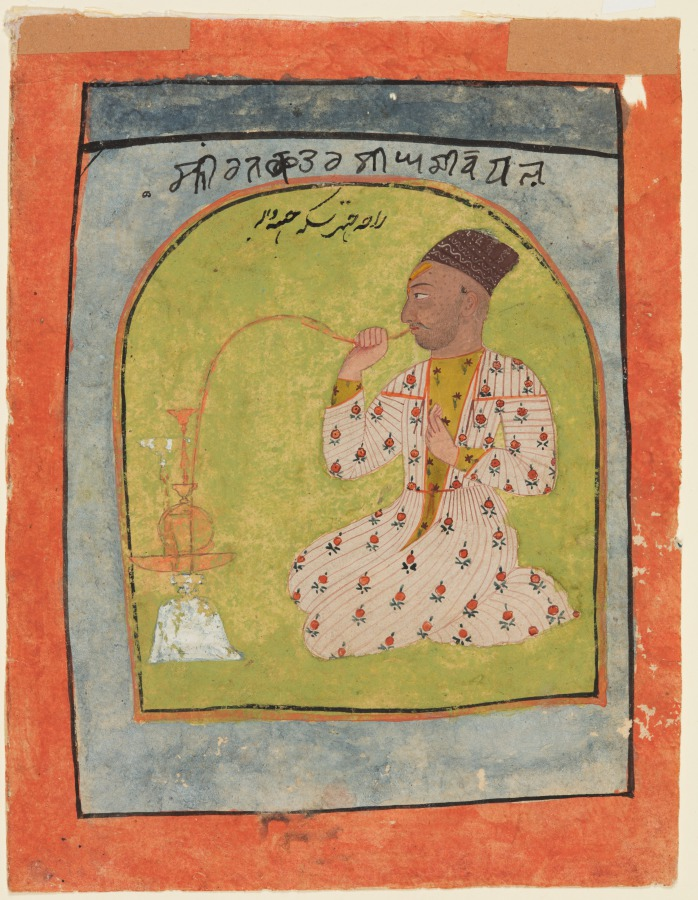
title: Posthumous portrait of Raja Chhatar Singh of Chamba smoking a hookah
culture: Northern India, Pahari kingdoms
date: c. 1700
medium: Gum tempera and ink on paper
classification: Painting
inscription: śrī raja chatara sīgha cībeyaḷa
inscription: rājā catara siṃgha cambā vāla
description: Raja Chattar Singh’s reign, from 1664 to 1690, is considered to be a period of prosperity for Chamba. During that time, boundaries of the kingdoms were expanded, and the economy thrived. He is best known for defying the Mughal emperor Aurangzeb’s orders to demolish all the Hindu temples in his realm. Instead, he installed copper gilt wooden umbrellas on the temples, many of which exist to this day.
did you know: The Raja wears a Central Asian robe instead of the popular Mughal jama.